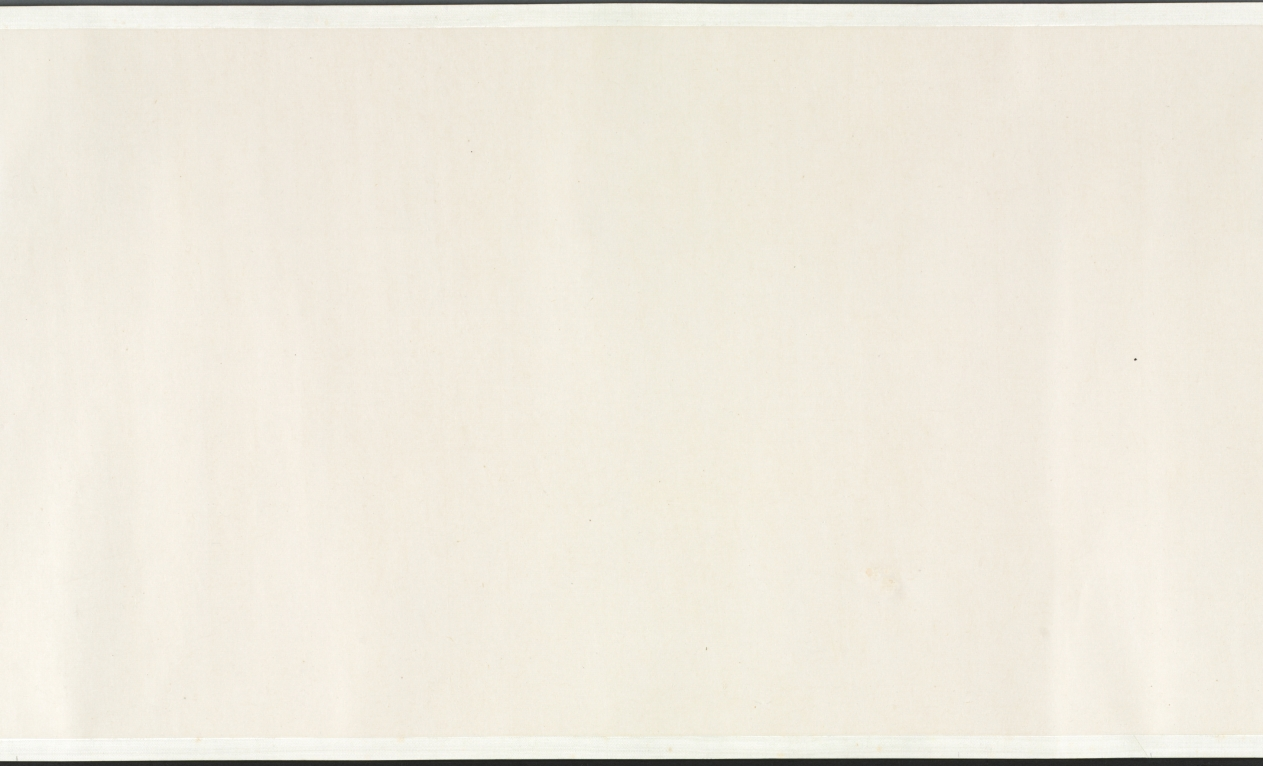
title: Buddha's Conversion of Five Bhiksu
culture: China, Yuan dynasty (1271–1368)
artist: Li Sheng (Chinese, active c. 1324–after 1375)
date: mid-1300s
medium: handscroll; ink on paper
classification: Painting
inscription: 紫篔生李升識 [印] 李氏子雲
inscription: 4 colophons and 12 additional seals: The "Heart" Sutra (Maha Prajnaparamita) text written by Wu Yuqing 吳餘慶 (active early 1400s); 2 seals of Xu Qianxue 徐乾學 (1631–1694); 3 colophons, one dated 1929 and two dated 1936, and 9 seals of Wu Hufan 吳湖帆 (1894–1968); 1 colophon, dated 1932, of Chen Dingshan; 1 seal unidentified.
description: This episode stems from the life of the historical Buddha, who, after his enlightenment, was initially hesitant about preaching his own doctrine. After much personal deliberation and prodding by deities, he finally relented. The first converts were the five guards who served him when he was still a prince. For Li Sheng, this is the pretext of the painting, which moves from the interaction of the bhiksu with the Buddha to a broader awareness of the vast surroundings of the scene.